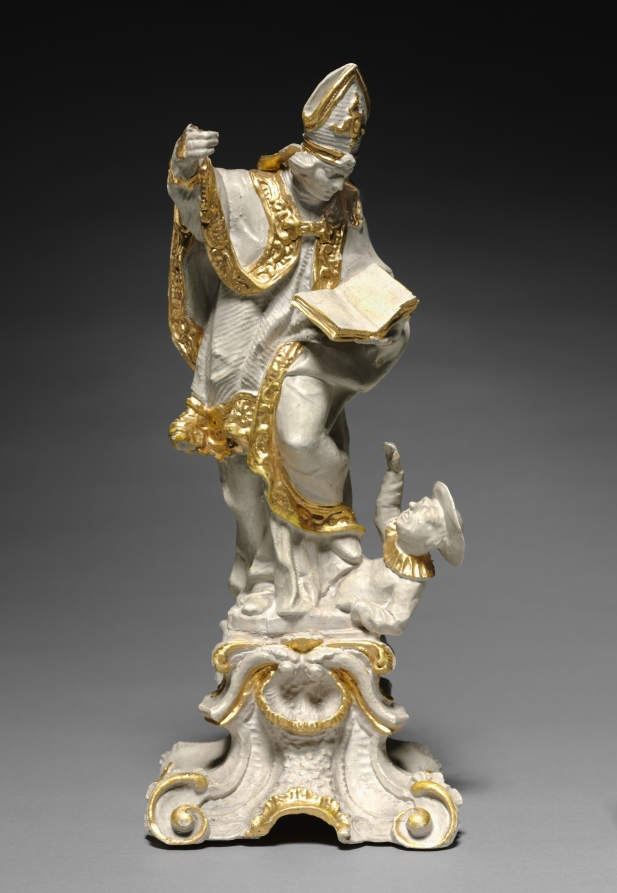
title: Bishop Saint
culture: Germany, 18th century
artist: attributed to Ferdinand Tietz (Austrian, 1708–1777)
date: c. 1740–1750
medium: painted and gilded wood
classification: Sculpture